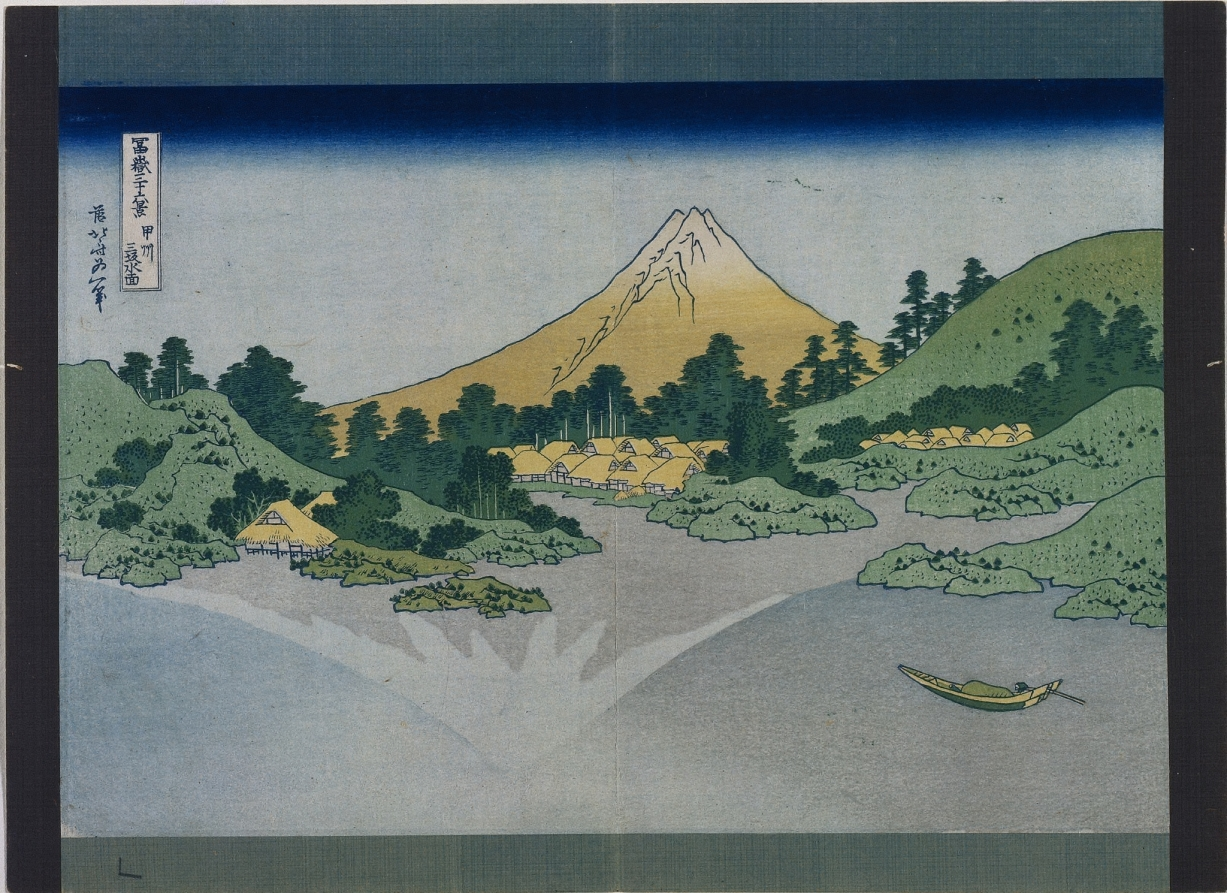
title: Thirty-Six Views of Mt. Fuji: The Surface of Lake Misaka in Kai Province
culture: Japan, Edo period (1615–1868)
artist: Katsushika Hokusai (Japanese, 1760–1849)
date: early 1830s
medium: color woodblock print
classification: Print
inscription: Signature: Zen Hokusai Iitsu hitsu Publisher: Nishimuraya Yohachi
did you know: Mount Fuji is reflected in the clear water of the lake.